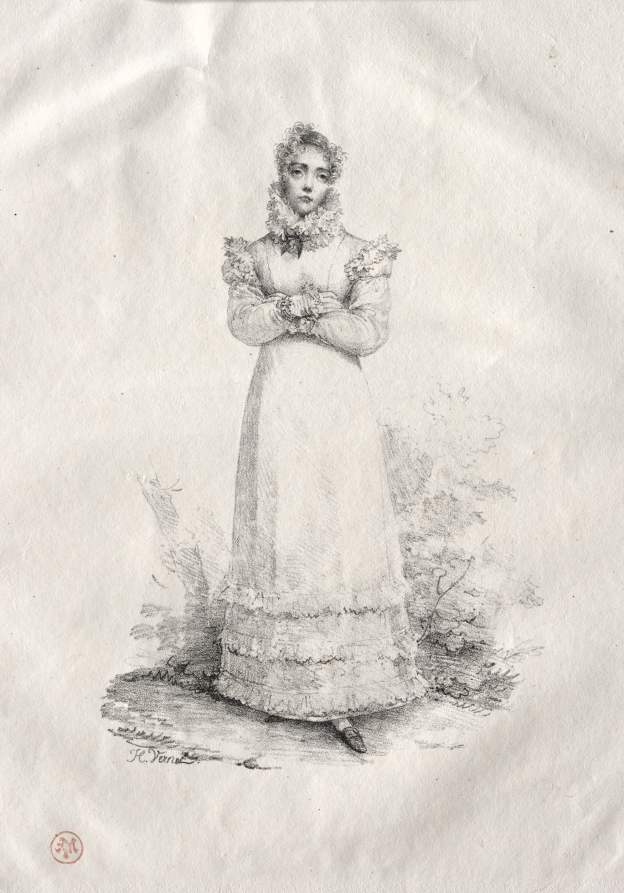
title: Young Woman Standing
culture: France, 19th century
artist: Horace Vernet (French, 1789–1863)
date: c. early 1800s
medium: lithograph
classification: Print